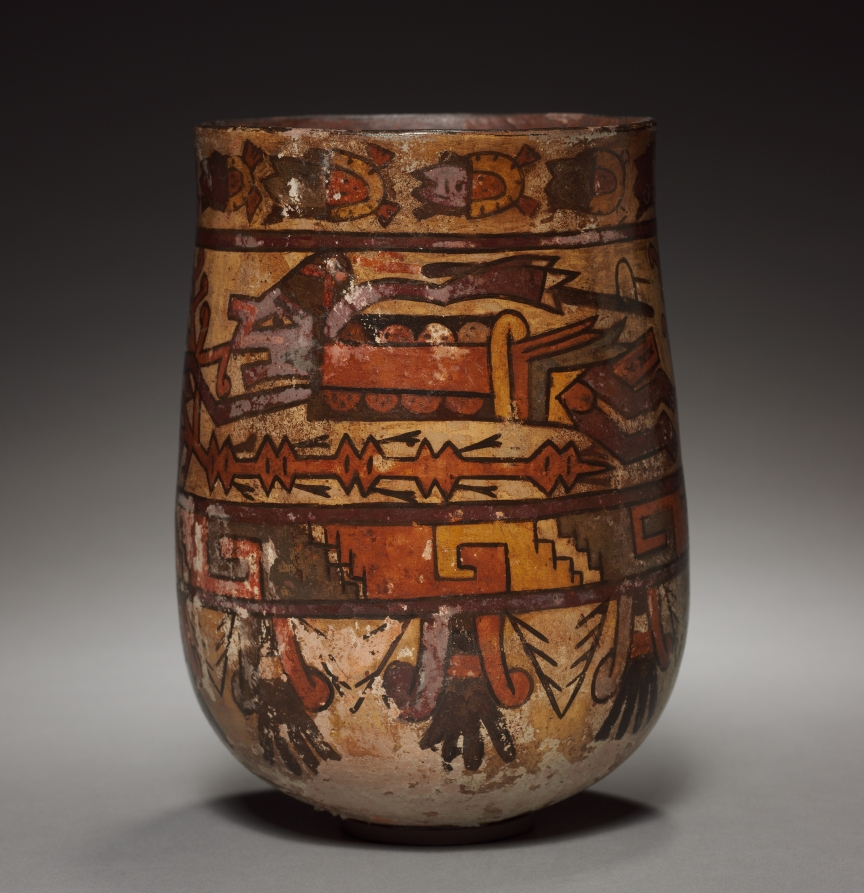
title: Vase with Trophy-heads and Warriors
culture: Peru, South Coast, Nasca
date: c. 450–600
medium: earthenware with colored slips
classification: Ceramic